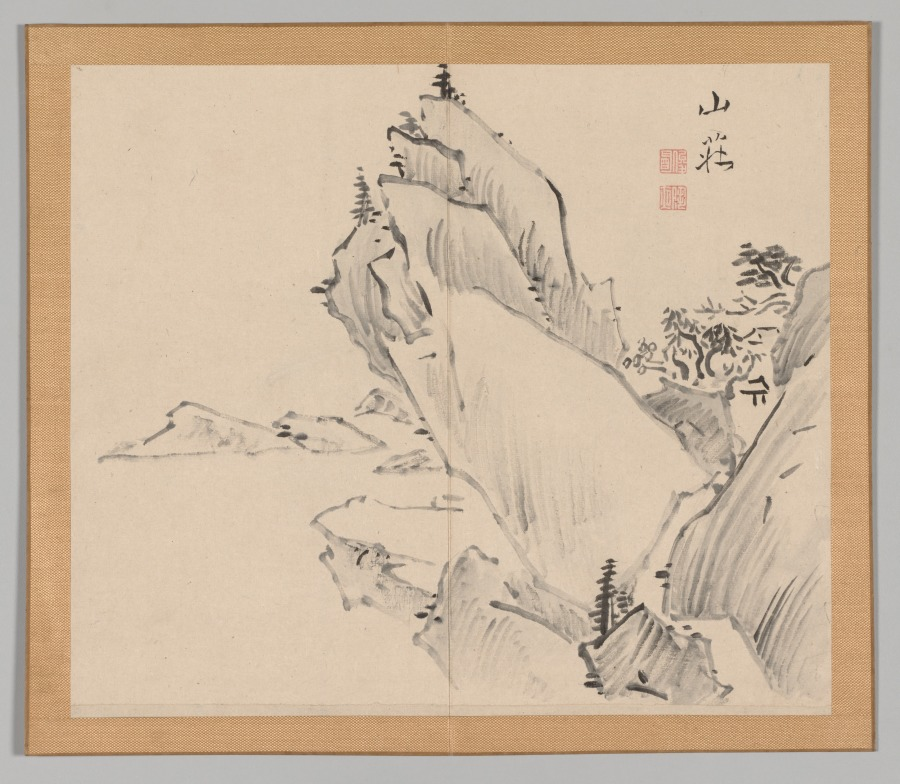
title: Reverberations of Taiga, Volume 1 (leaf 30)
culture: Japan, Edo period (1615–1868)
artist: Aoki Shukuya (Japanese, d. 1802)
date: mid- to late 1700s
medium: double-leaf from a pair of albums; ink and light color on paper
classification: Portfolio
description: Traditionally, young painters in Japan began their studies with an established master-painter. The master's compositions invariably became models that the apprentice copied to learn various ink and brush techniques. Shukuya was a pupil of the famous Kyoto artist Ikeno Taiga, whose style is reflected in these sketches of rocks, trees, and mountains.